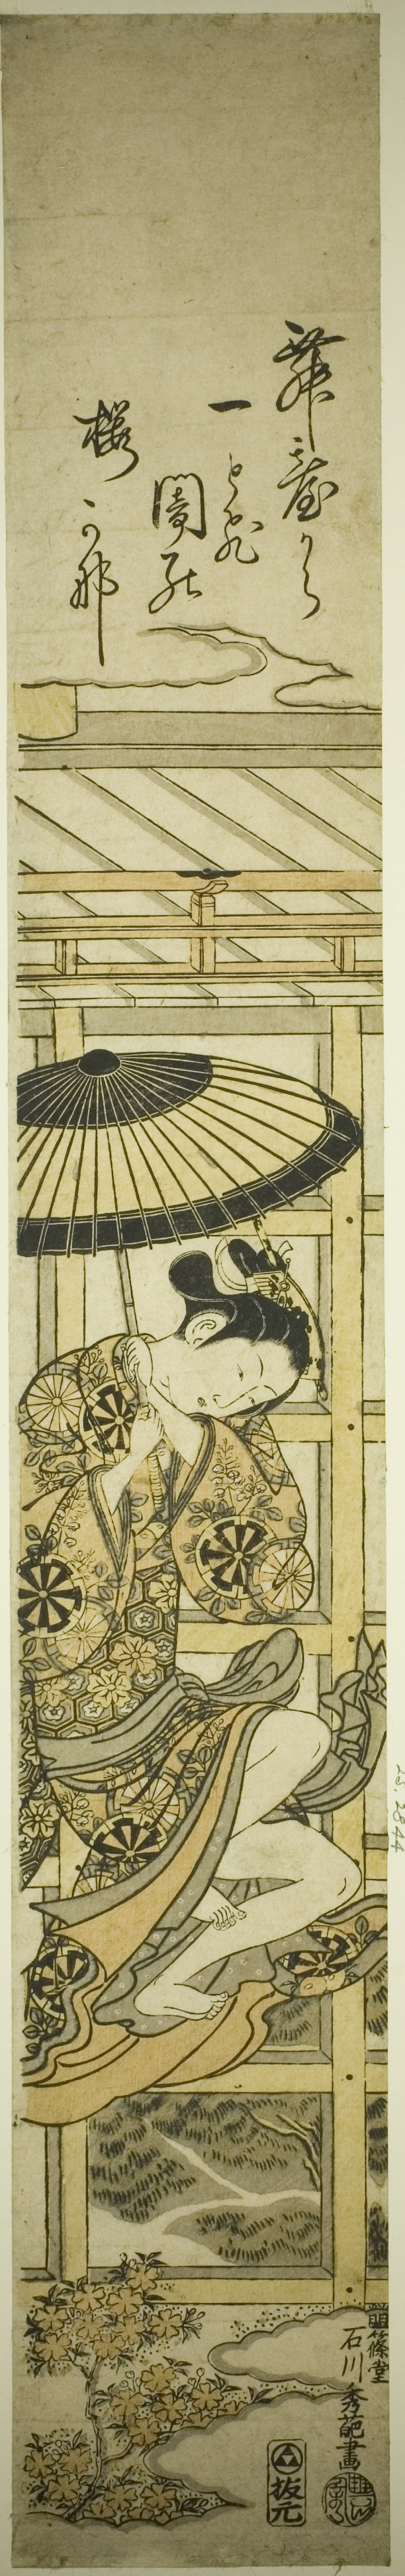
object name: Print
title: Leaping from Kiyomizu Temple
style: Japanese (culture or style)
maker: Ishikawa Toyonobu (Japanese, 1711-1785)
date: late 1750s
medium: Color woodblock print; hashira-e, benizuri-e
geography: Japan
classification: woodblock print; print; asian art